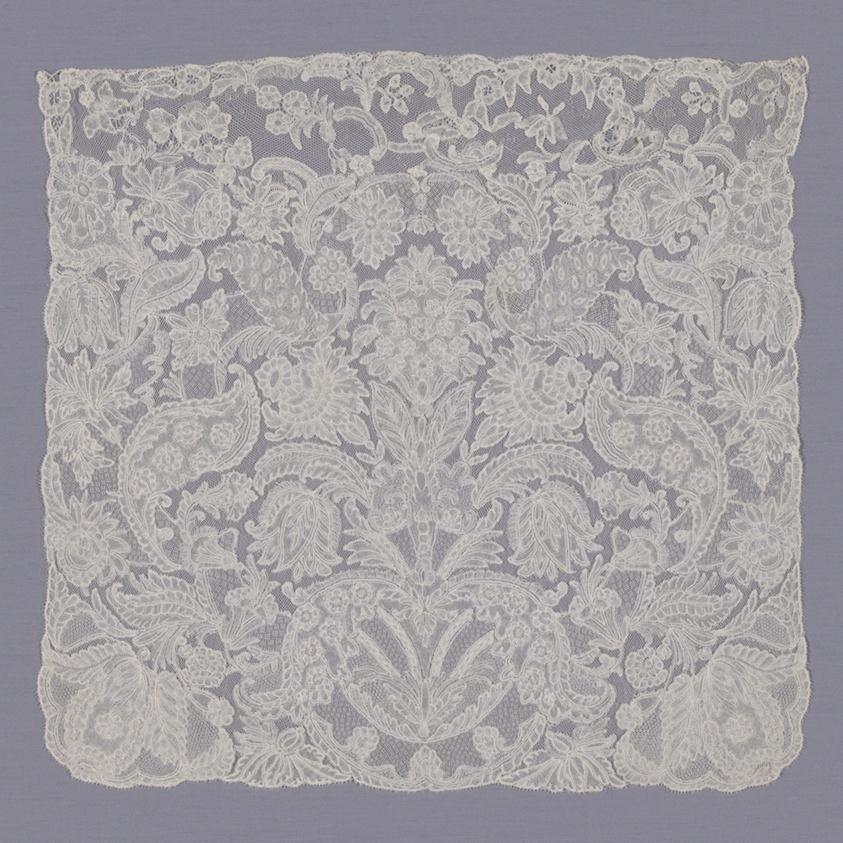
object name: Textile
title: Cravat End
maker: Belgium, Flanders, Brussels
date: 1730s/40s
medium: Linen, bobbin part lace of a type known as "Brussels" with a Droschel mesh ground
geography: Flanders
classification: textile; lace - bobbin; lace